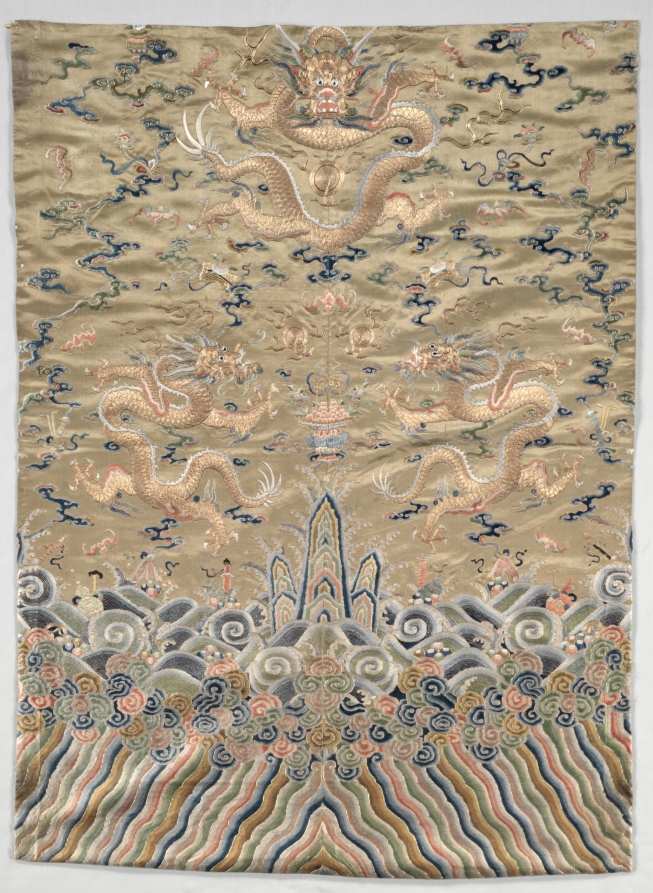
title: Fragment of a Mandarin Robe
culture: China, Qing dynasty (1644–1911)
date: 1700s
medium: embroidery, silk and gold thread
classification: Embroidery